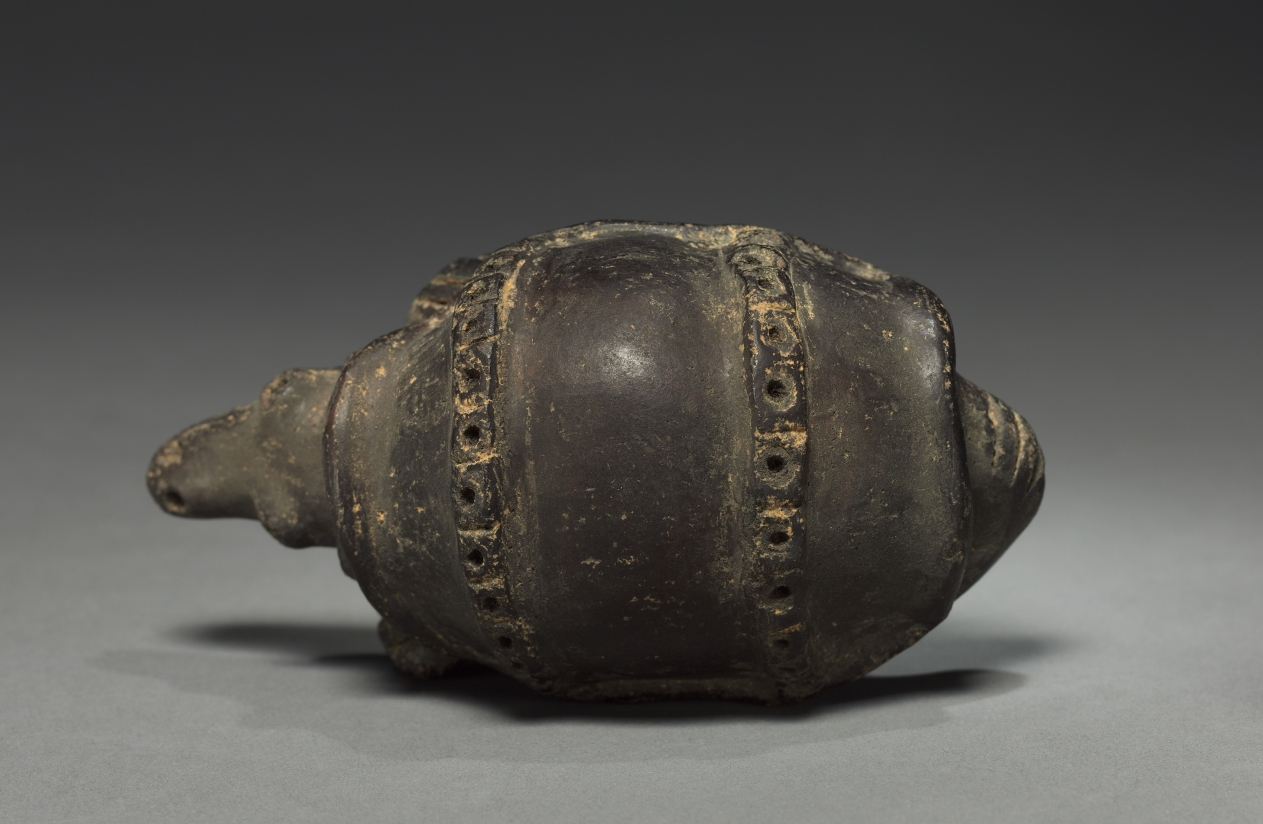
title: Armadillo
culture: Colombia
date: before 1921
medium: pottery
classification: Ceramic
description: Rattles that combine ravens, humans, and frogs are among the best known but least understood of the Northwest Coast object types. They clearly have mythic import and may have originated as shamans’ implements. But historically chiefs used them during secular parts of winter dances.